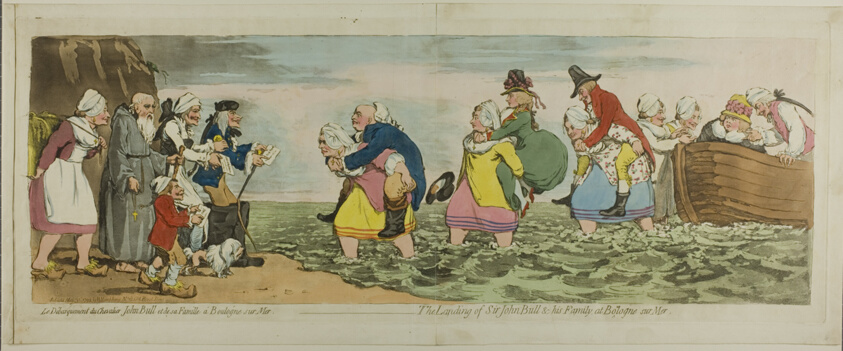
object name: Print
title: The Landing of Sir John Bull & His Family, at Boulogne sur mer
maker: James Gillray (English, 1756-1815); after Henry William Bunbury (English, 1750-1811); published by Hannah Humphrey (English, c. 1745-1818)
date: published May 31, 1792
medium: Hand-colored etching and aquatint on paper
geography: England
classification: aquatint; print; prints and drawing